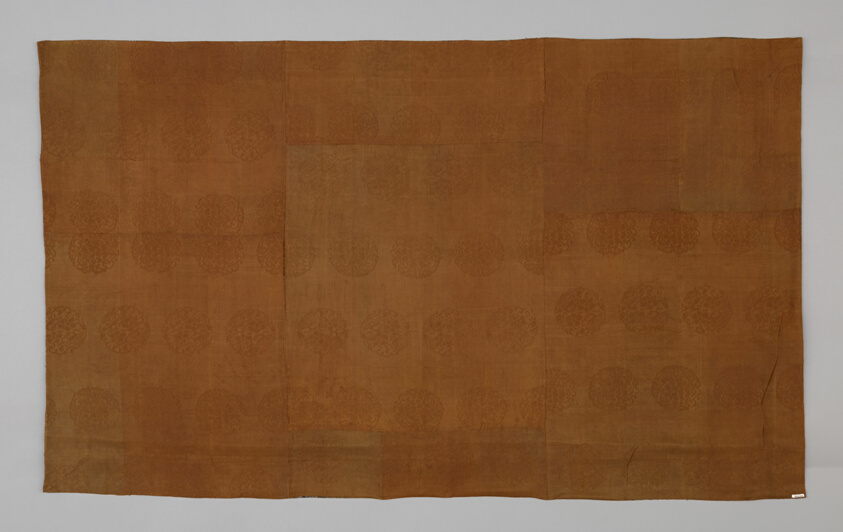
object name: Textile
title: Kesa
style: edo (japanese period)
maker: Japan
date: late Edo period (1789–1868), late 18th/early 19th century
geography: Japan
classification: textile; costume; liturgical - buddhist; weaving